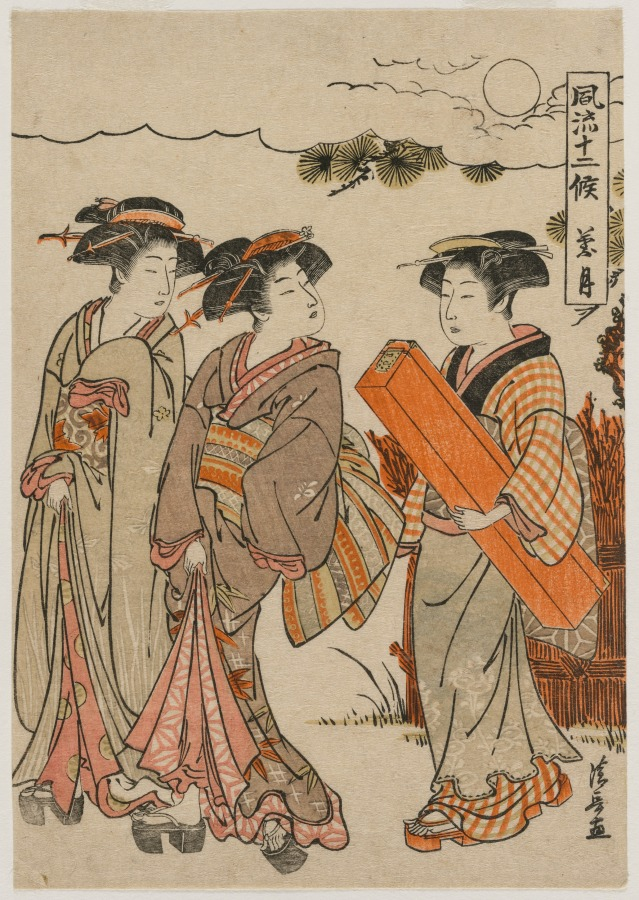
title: The Eighth Month (from the series Fashionable Presentations of the Twelve Months)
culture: Japan, Edo period (1615–1868)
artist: Torii Kiyonaga (Japanese, 1752–1815)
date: 1779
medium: color woodblock print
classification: Print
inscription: Signature: Kiyonaga ga